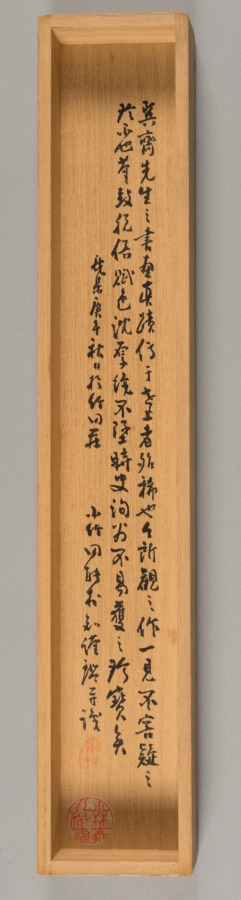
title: Landscape with Boaters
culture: Japan, Edo period (1615–1868)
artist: Kimura Kenkadō (Japanese, 1736–1802)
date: late 1700s–early 1800s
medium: hanging scroll; ink and slight color on paper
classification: Painting